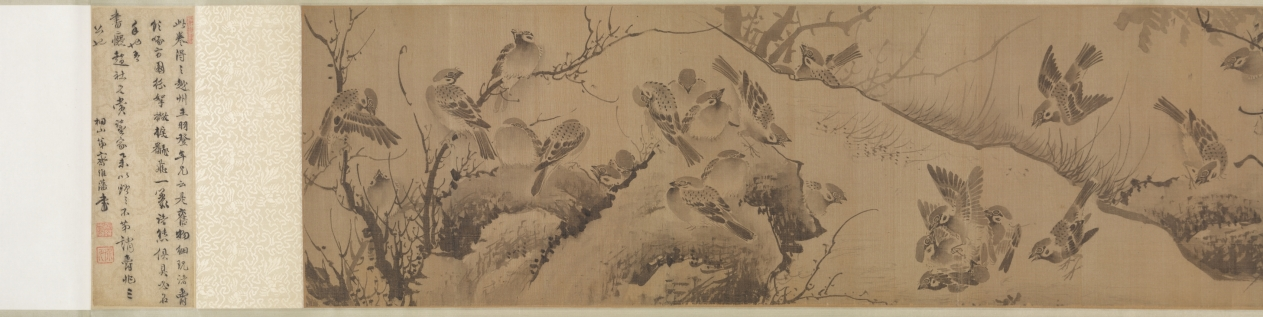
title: A Hundred Sparrows in a Lofty Grove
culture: China, Ming dynasty (1368–1644)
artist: attributed to Lin Liang (Chinese, 1416–1480)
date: 1368–1644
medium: handscroll; ink on silk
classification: Painting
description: Sparrows engaged in all kinds of activities frolic amid leafy branches, blades of grass, rocks, and a waterfall. As our eyes move over the scroll, the artist engages us in enjoying the sparrows’ carefree movements in a natural setting. The charming birds were painted from close observation in swift and fluent brushstrokes. Sparrows are a common bird and in Chinese painting they often represent the commoner in human society as opposed to the noble pheasant or peacock representative of the ruling class.